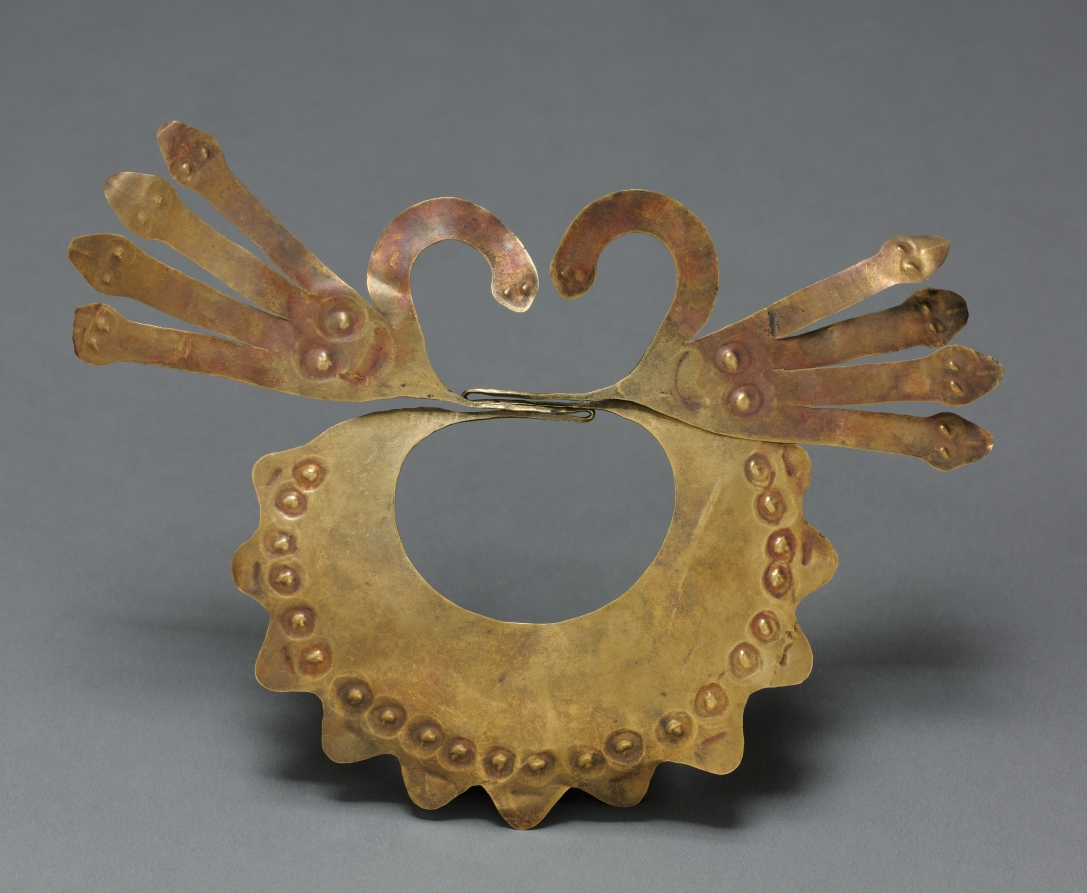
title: Mouth Mask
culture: Peru, South Coast, Nasca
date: 100 BCE–700 CE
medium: hammered gold alloy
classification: Metalwork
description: Nasca figures, like one on a bowl nearby, are shown wearing such forehead ornaments and mouth masks similar to these. The mouth mask hung from the nasal septum, the oval opening surrounding the mouth and the bristles positioned as feline whiskers, here transformed to serpents. Both were cut from sheet gold; details were worked freehand while the sheet rested on a soft surface.